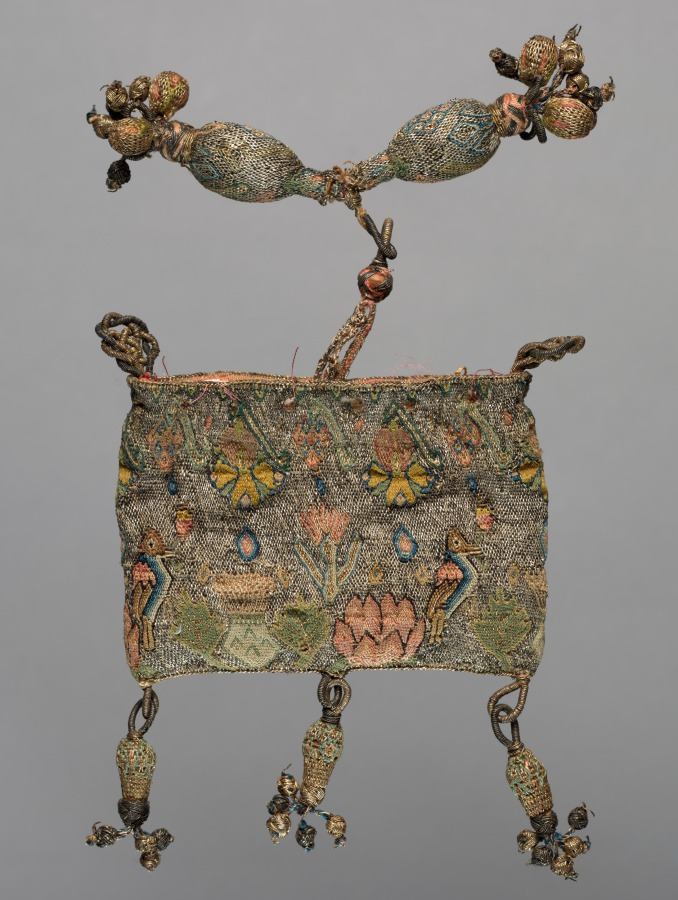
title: Purse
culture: England, early 17th century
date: early 1600s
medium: embroidery; silk and silver filé on linen ground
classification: Embroidery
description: According to Elizabethan embroidery scholar Jacqui Carey, this purse and its trimmings are typical of a ‘sweet bag’, though it is missing its handle and its drawstring is damaged. The term ‘sweet bag’ was popularized in George Wingfield Digby’s 1963 publication on Elizabethan embroidery; Digby used the term to describe small English purses dating from the 1500s and 1600s. The body of the purse is not the usual embroidered linen. Instead, it is a form of tubular warp-wrapping, a larger version of the structure and design found on tassels typical of the period. The body of the purse is made from a spiraling weft wrapped with multiple warp threads. It is assumed that it was made over a cylindrical form that was removed when the work was complete. The motifs are created by shifting the colored threads. Black silk warp threads that have since disintegrated expose the spiraling weft.